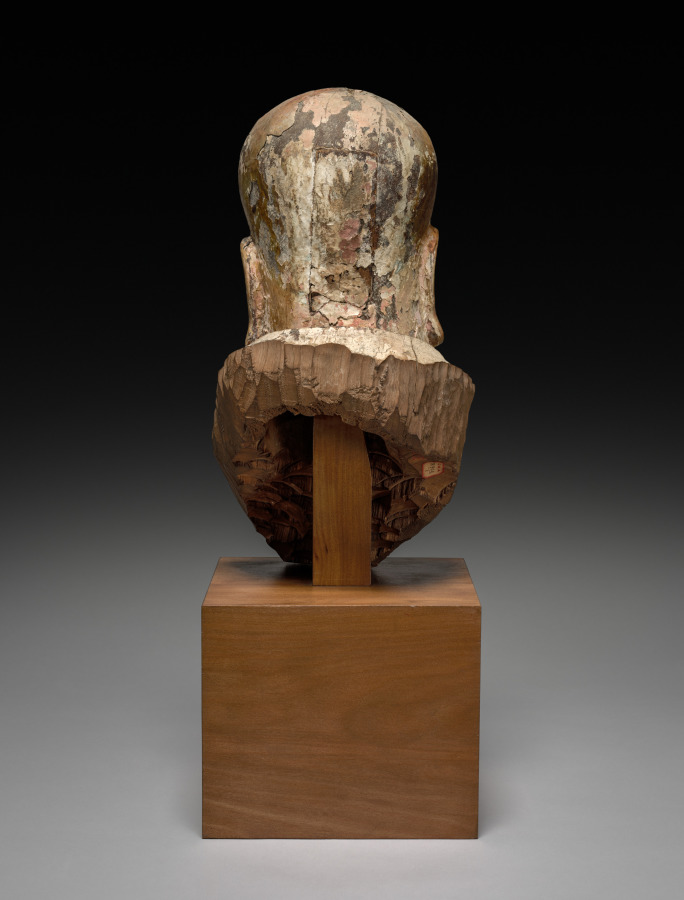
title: Head of a Patriarch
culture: China, Ming dynasty (1368-1644) or earlier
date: 1368–1644 or earlier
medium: wood covered with lacquer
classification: Sculpture